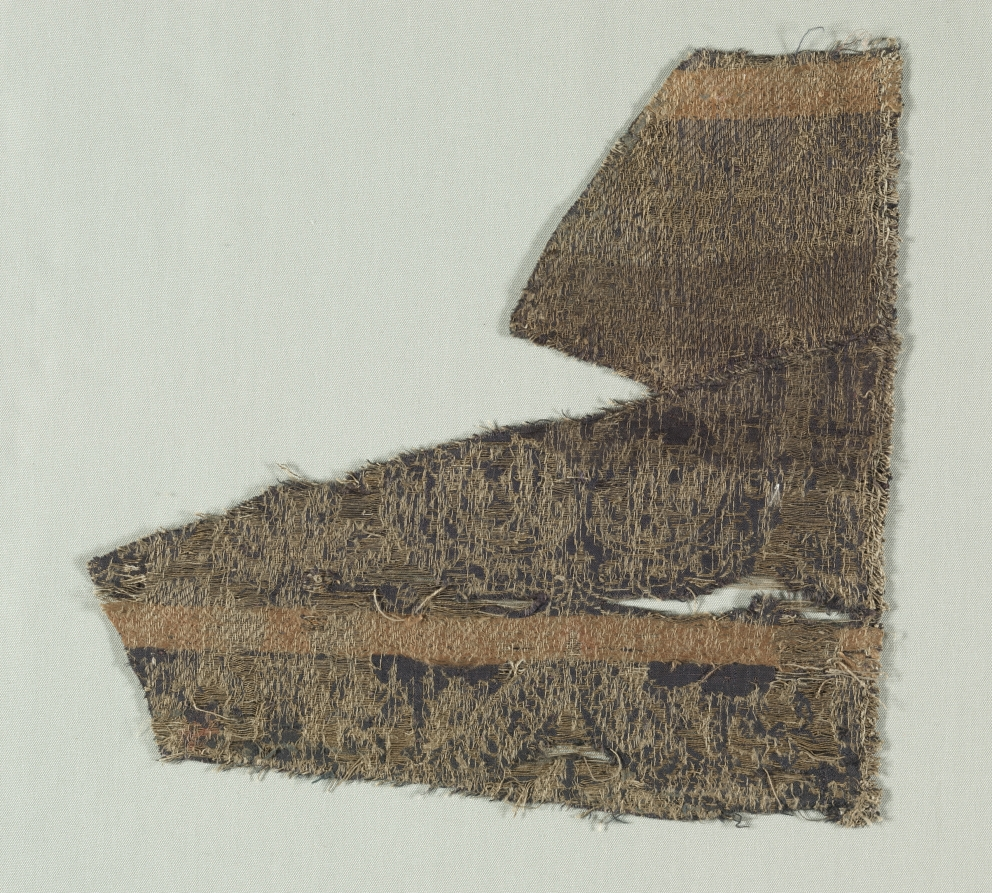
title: Silk with Dogs and Arabic Script in Swaying Bands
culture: Italy, last third of 14th century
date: 1370–1400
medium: silk and silver thread; a combination of two weaves, 2/1 twill and 1/5 twill (lampas)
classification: Textile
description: Arabic script was included in many Italian silk patterns during the 1300s and early 1400s. Usually a few unintelligible but decorative Arabic letters were repeated in the design, but here, the pseudo-Arabic script is prominently displayed in the scalloped bands that support trefoil palmettes. Dogs and birds are incorporated into the pattern in an Italian fashion. During the 1300s and 1400s, Arabic script was featured in luxurious silks woven in Islamic territories, where it symbolized royal power. Spain, Egypt, and to a lesser extent the former Islamic territory of Sicily all produced examples that could have influenced the international silk style created by Italian silk designers. In addition, weavers may also have reinforced the fashion; they migrated from Sicily to the silk-weaving city of Lucca and subsequently to Venice. In Italian painting, pseudo-Arabic script not only decorated the border of the Virgin's mantle, but it was also repeated in silks displayed in the backgrounds.